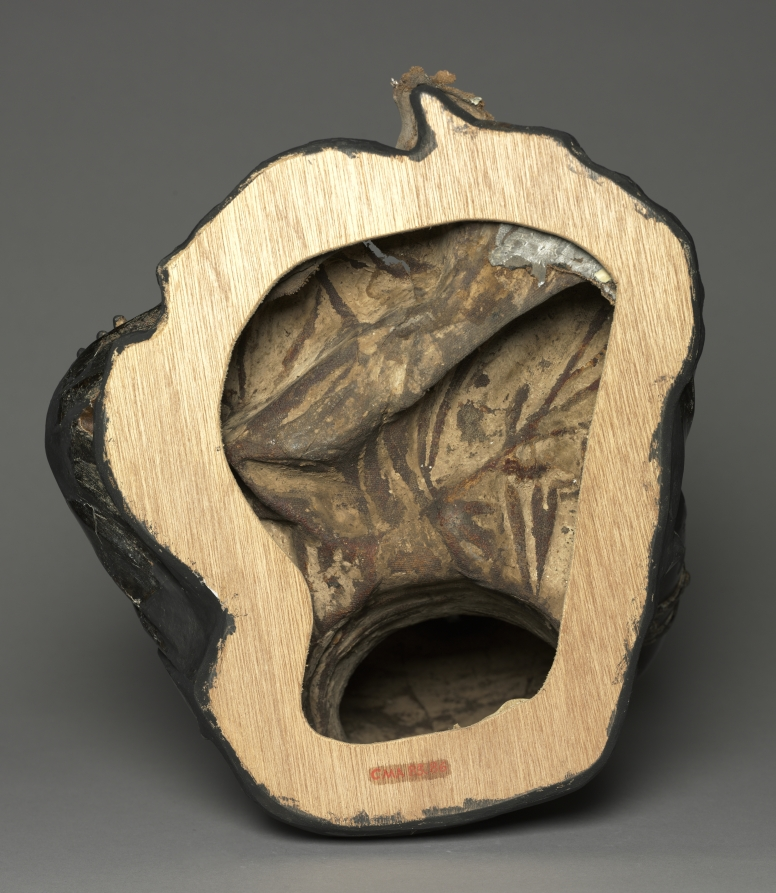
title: Bodhisattva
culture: China, Tang dynasty (618-907)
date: 700s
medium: dry lacquer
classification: Sculpture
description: The bodhisattva, an enlightened being dedicated to the spiritual awakening of all beings, is shown sitting in a relaxed pose, the eyes half-closed in an expression of profound meditation. The statue is modeled in a sensuous manner. It is made using the dry lacquer technique whereby a clay core is first constructed and then overlaid with fabrics saturated with lacquer. Once the lacquer layers are set, the core is removed. This kind of hollow dry lacquer statue is lightweight and easy to carry. The piece once suffered from severe surface retouching that distorted its original beauty. The museum's conservation work has removed coats of overpainting and over-restoration, revealing the true appearance of the glossy black lacquered surface with traces of cut-gold decoration and pigments.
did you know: While lacquer is tough and impervious to insects, it is less durable than wooden or stone sculptures, so this is a rare surviving Tang example.